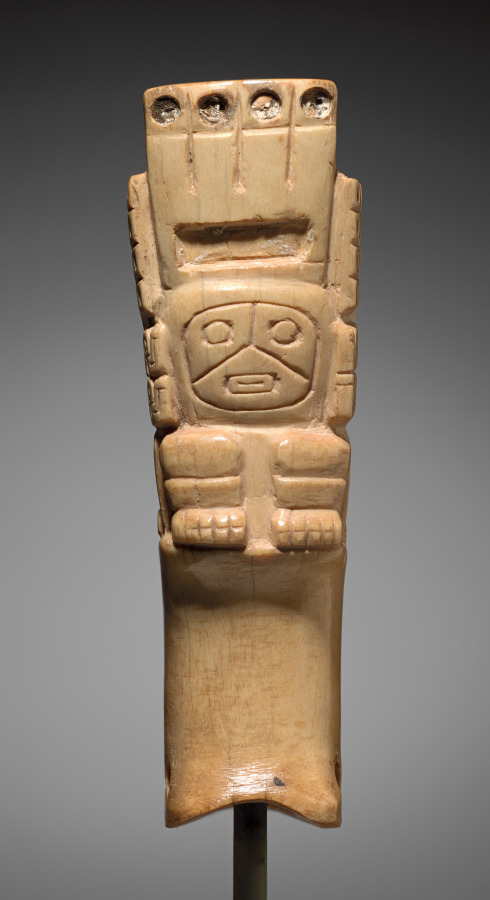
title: Thumb Rest of a Spear Thrower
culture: Andes, Wari people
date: 600–1000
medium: Bone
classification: Implements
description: This object was lashed to a spear thrower, where it served as a thumb rest or grip. The imagery is suited to the use: a supernatural being throttles a human, turning its head to expose its throat to a knife the being holds in one hand. Thus, the scene captures the crucial moment of an offering likely intended to assure the benevolence of divine forces.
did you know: Spear throwers, also called atlatls, use leverage to propel a spear faster and farther.